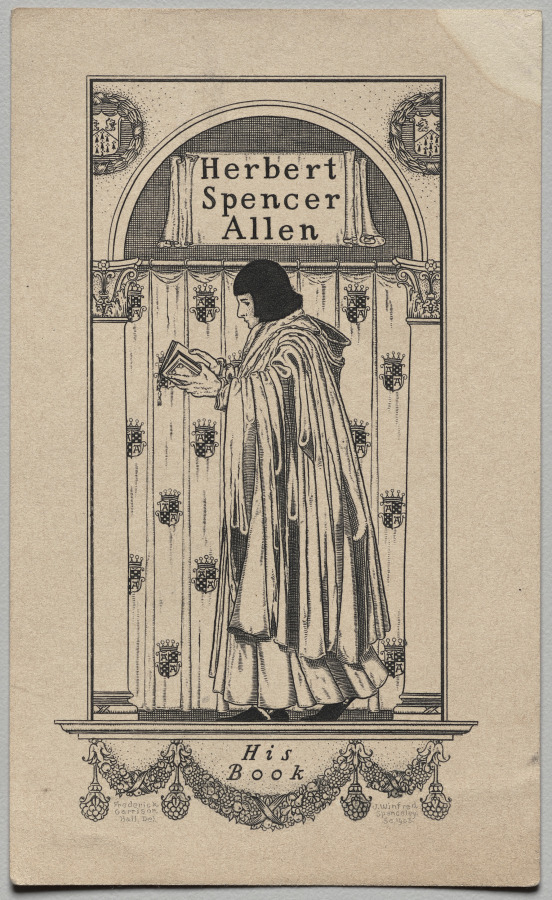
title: Bookplate: Herbert Spencer Allen, His Book inscribed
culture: America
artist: Frederick Garrison Hall (American, 1879–1946)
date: 1903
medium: engraving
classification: Print